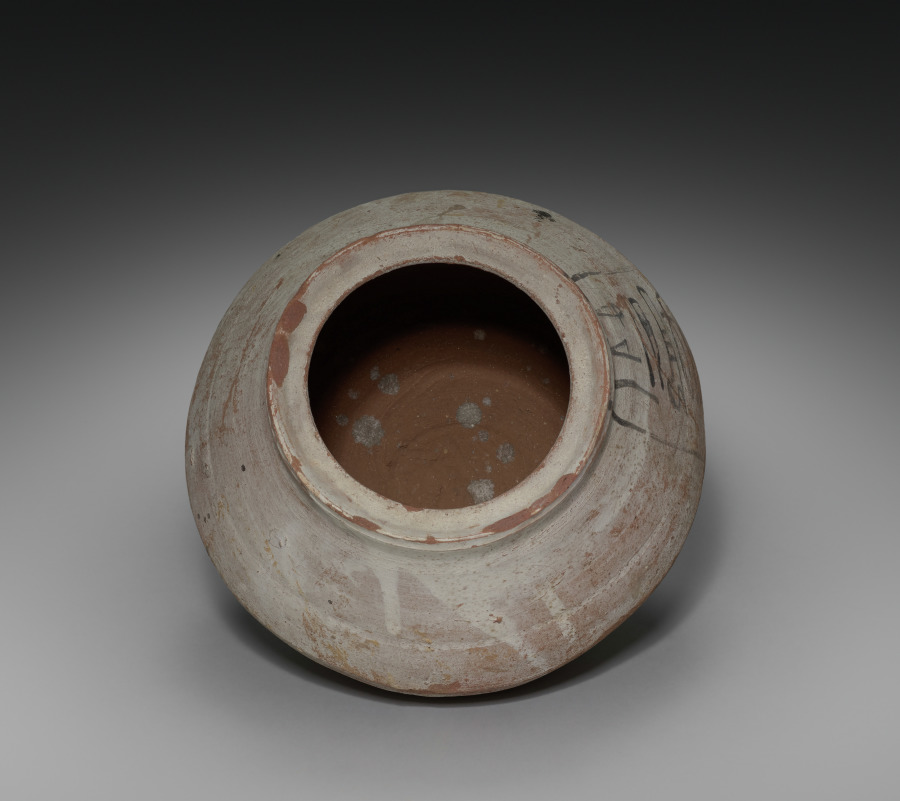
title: Shawabty Jar with Lid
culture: Egypt, New Kingdom (1540–1069 BCE), Dynasties 19–20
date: 1295–1069 BCE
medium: Nile silt ware; lid of limestone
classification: Funerary Equipment